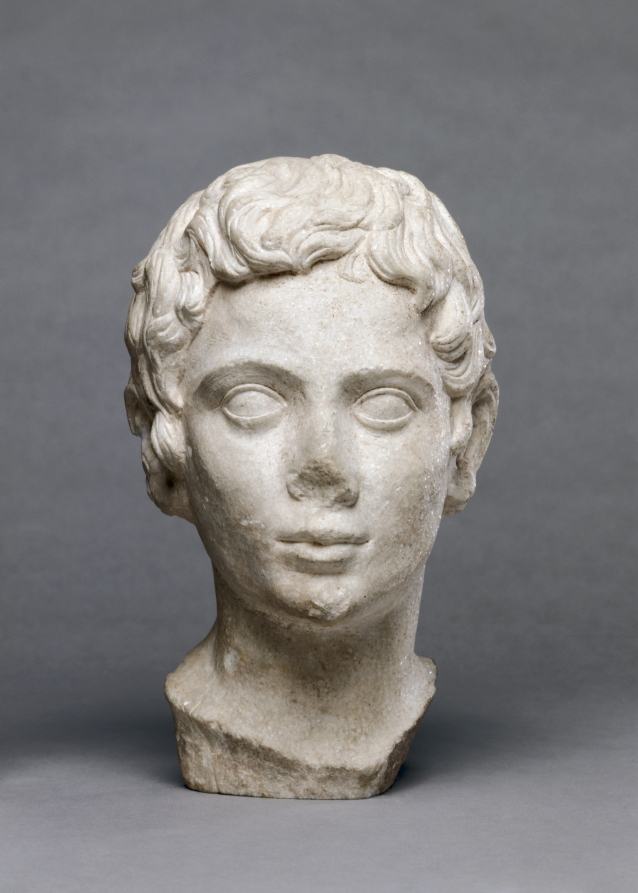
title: Portrait Head of a Youth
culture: Egypt, Alexandria, Roman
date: 1–100 CE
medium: marble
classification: Sculpture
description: Several unusual features of this head suggest that its carving was never finished in antiquity. These include unfinished hair around the ears, small bumps remaining in the hair near the front and top of the head, and the lack of a finely polished surface. Although said to have been found in Egypt, the head is carved of dolomitic marble thought to come from the Saliari region of the northern Greek island of Thasos.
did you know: The carving of this head was never finished.